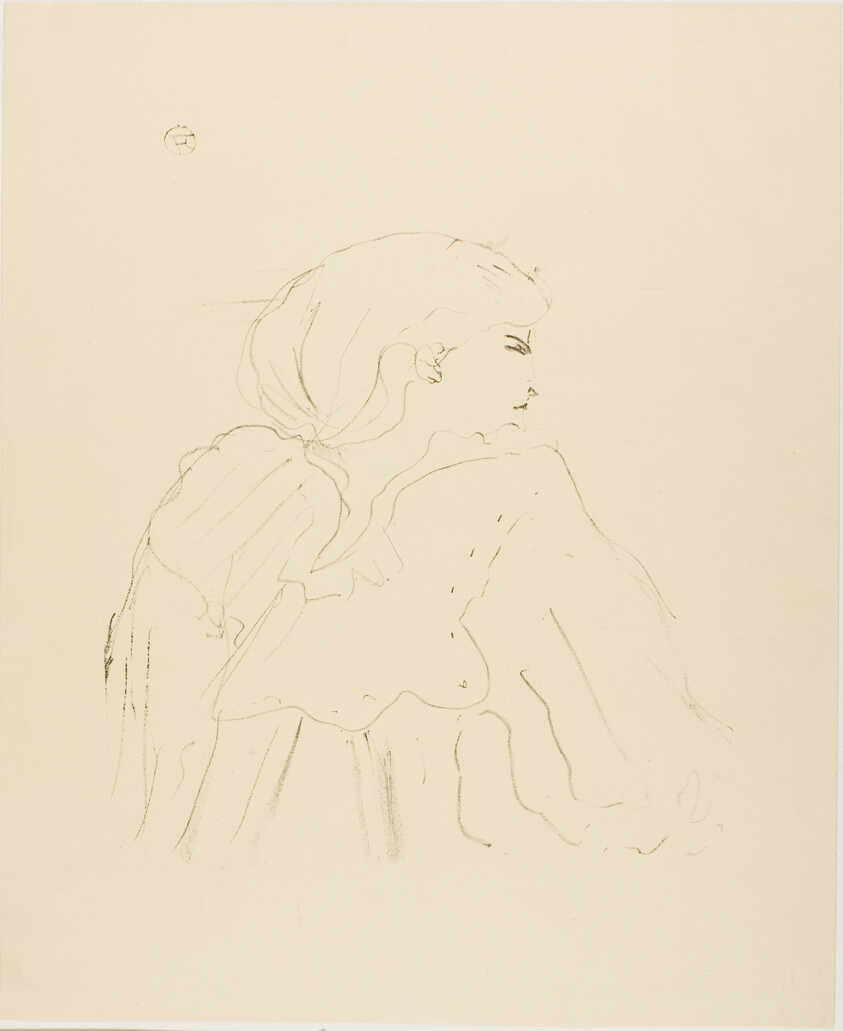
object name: Print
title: Jane Hading, from Treize Lithographies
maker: Henri de Toulouse-Lautrec (French, 1864-1901)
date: 1898, published before 1906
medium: Lithograph on cream wove paper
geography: France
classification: lithograph; print; prints and drawing